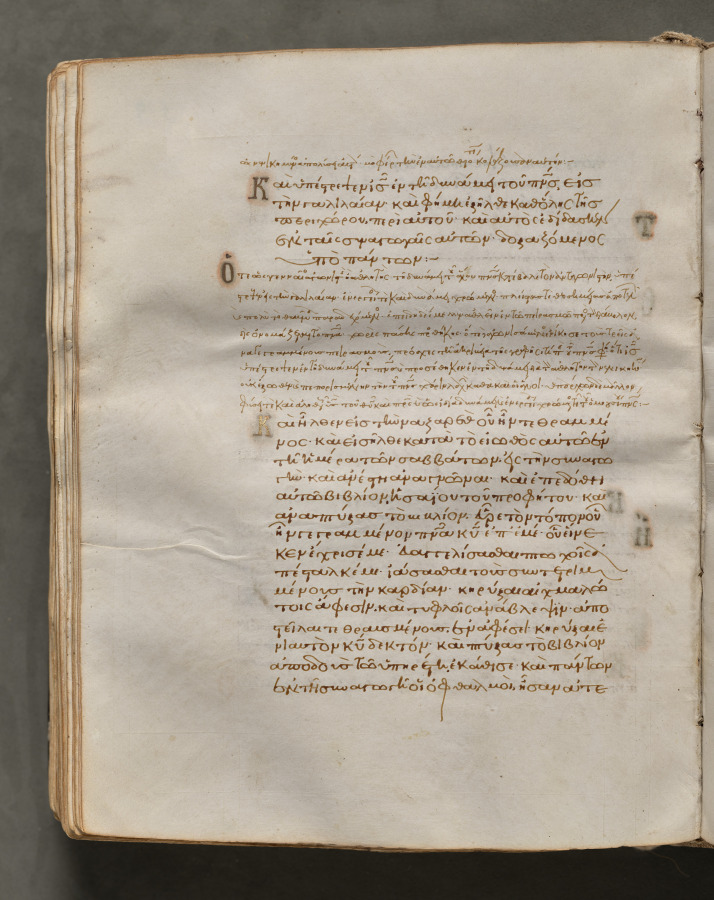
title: Text, folio 219 (verso), from a Gospel Book with Commentaries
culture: Byzantium, Constantinople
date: c. 1000–1100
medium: ink, tempera, and gold on vellum; leather binding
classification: Bound Volume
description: Each of the four gospels in this book opens on a page with brilliantly illuminated borders depicting the author of the text as well as birds-principally peacocks, symbols of the immortality of the soul-and fountains, representing the fountain of life and the salvation of the soul. This volume consists of 428 leaves with texts in Greek. Its level of sophistication suggests that it was probably written and decorated in a monastery in Constantinople.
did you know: Gospel Books were carried in procession through Byzantine churches.